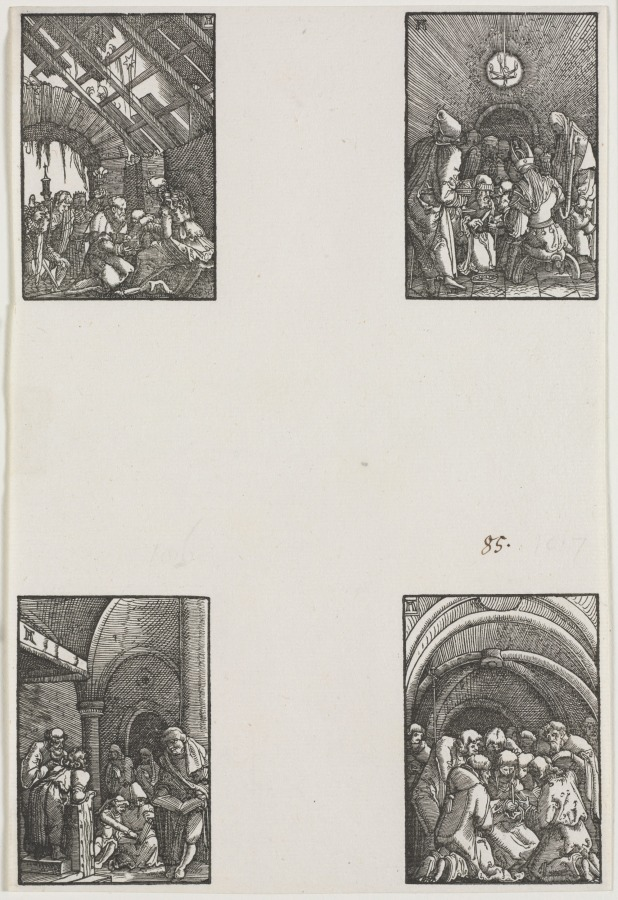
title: The Fall and Redemption of Man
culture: Germany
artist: Albrecht Altdorfer (German, c. 1480–1538)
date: c. 1515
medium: woodcut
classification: Print